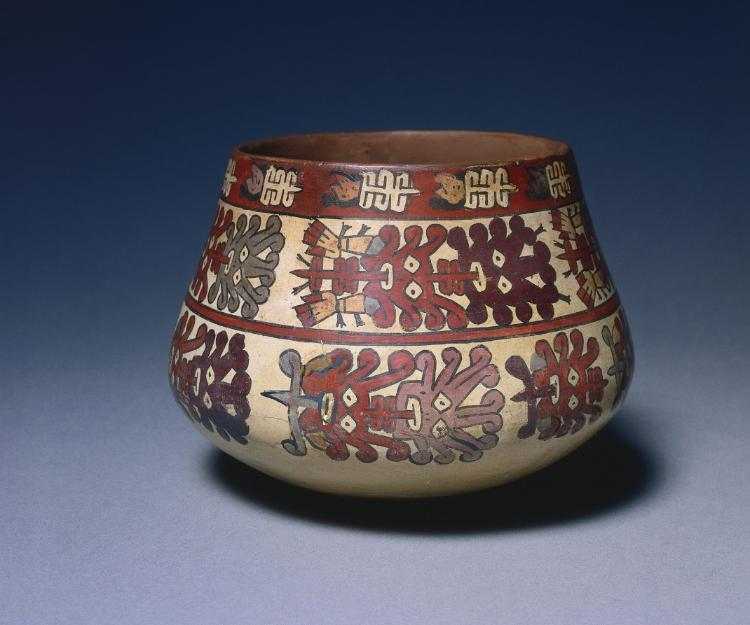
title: Vessel with Abstract Heads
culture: Peru, South Coast, Nasca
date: 100 BCE–700 CE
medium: earthenware with colored slips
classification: Ceramic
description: Late Nasca supernatural depictions became abstract, detailed, and focused on the head. In this vessel's central register, for instance, a deity is reduced to two mask-like faces, edged by volutes and linked by tongues; the only remains of a body are the hands. The lower register carries a similar image, and the upper register has severed human heads.